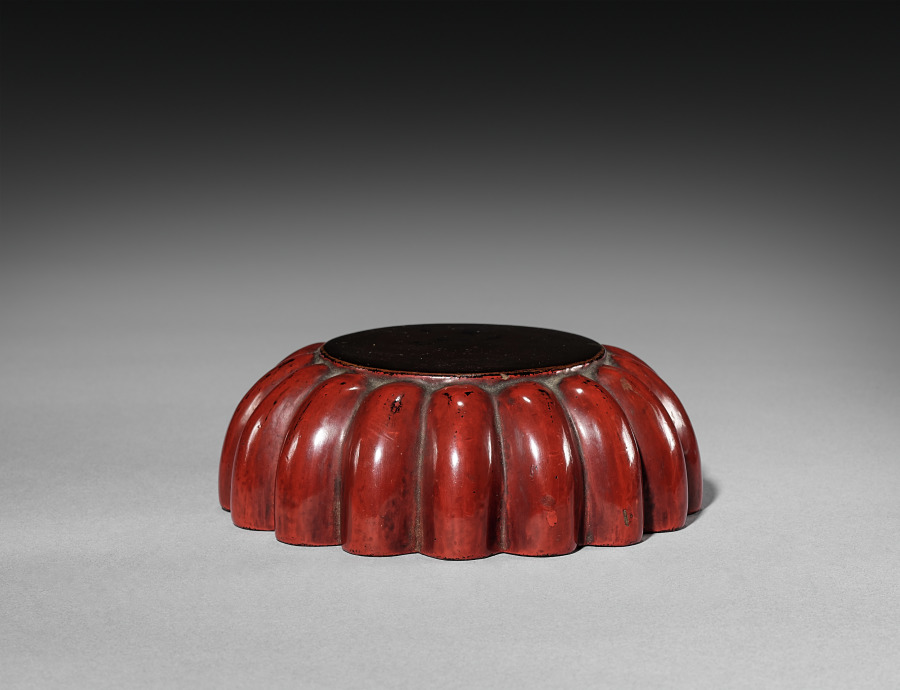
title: Tea Caddy (Chaire) (lid)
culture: Japan, Muromachi period (1392–1573)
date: 1500s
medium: Negoro lacquer on wood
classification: Lacquer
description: Negoro is a lacquer technique, named after the Negoro temple in Japan, in which several layers of red lacquer are applied over a black lacquer undercoating. Through years of handling, a natural surface of red and black random patterns emerges, an aesthetic highly prized by the Japanese.